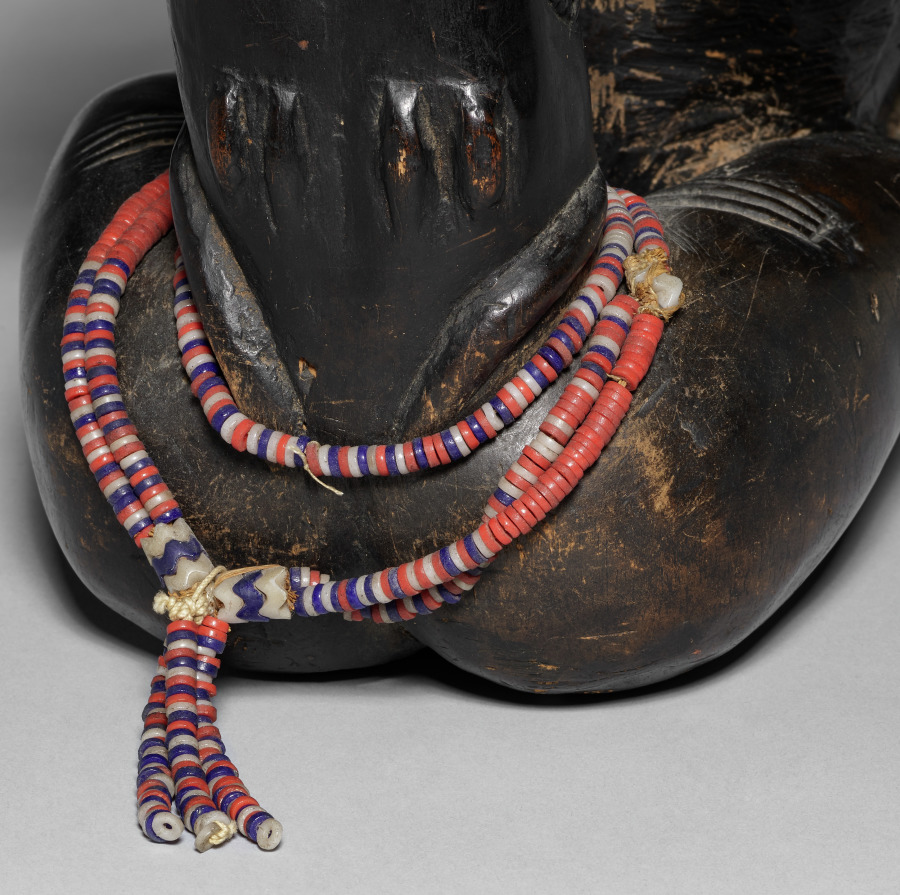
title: Female Bowl-Bearing Figure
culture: Africa, Central Africa, Democratic Republic of Congo, Luba-style carver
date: late 1800s-early 1900s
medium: Wood, glass beads, upholstery studs, plant fiber, and iron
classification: Sculpture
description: In Luba-style art, an object's beauty affects how well it works. While bowl-bearing figures had many possible uses, a royal diviner likely used this well-carved image of a woman carrying a bowl in rituals. Dusty traces of mpemba (white chalk) fleck the shining exterior and the bowl's interior, showing it once held this sacred powder. Diamond-shaped scarification marks at her waist, chest, and back add to her beauty. Her hair is carved into the cascading layered hairstyle worn in the Luba region at the turn of the twentieth century. Strands of imported glass beads encircle her waist and neck, and dangle from her hair. The alternating white and blue beads may symbolize the moon and Mbidi Kiluwe, a culture hero linked to royal practice and smithing. While much Luba-style art depicts women—who are societally important—men created and owned the majority of such works.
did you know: Symbolic of anvils, the round metal tacks decorating the figure's hair "pin" spirits and their secrets within it. They are at the hairline and each of the four hair cascades (the bottommost is now gone).